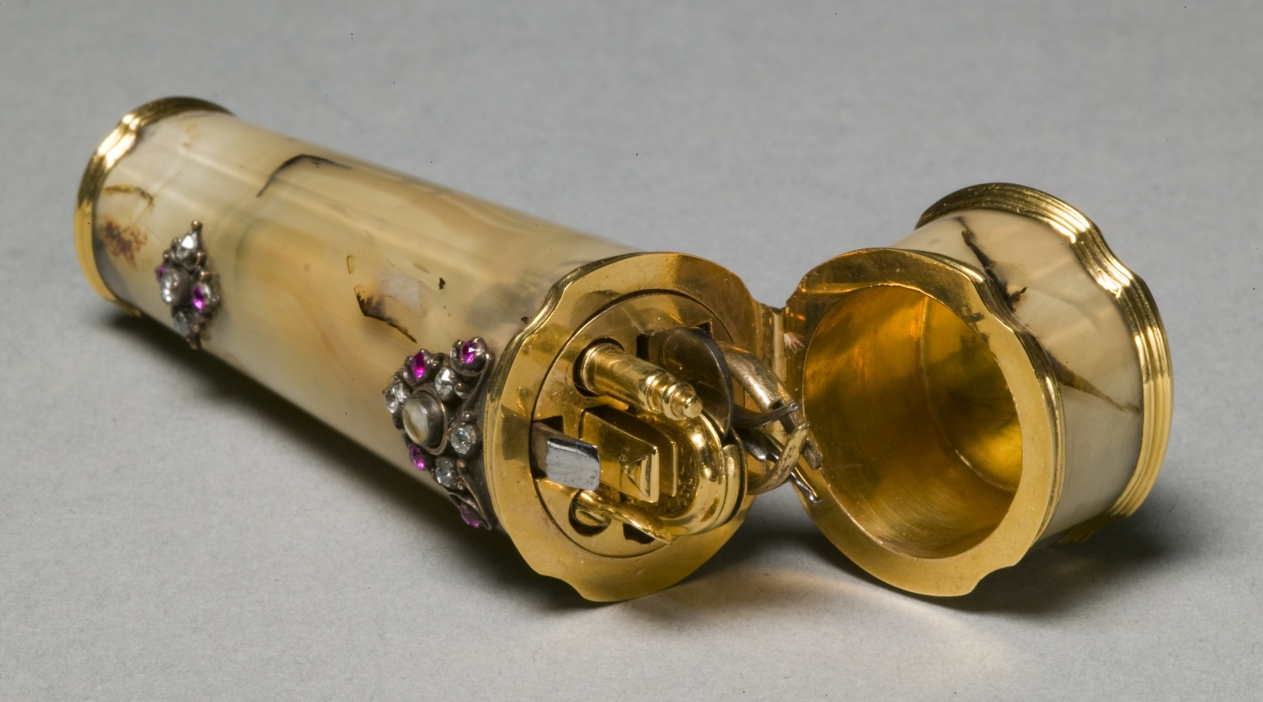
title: Vanity Case (Etui)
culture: England, mid 18th century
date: c. 1745–60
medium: gold mounted agate, diamonds, rubies, interior fitted with implements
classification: Miscellaneous